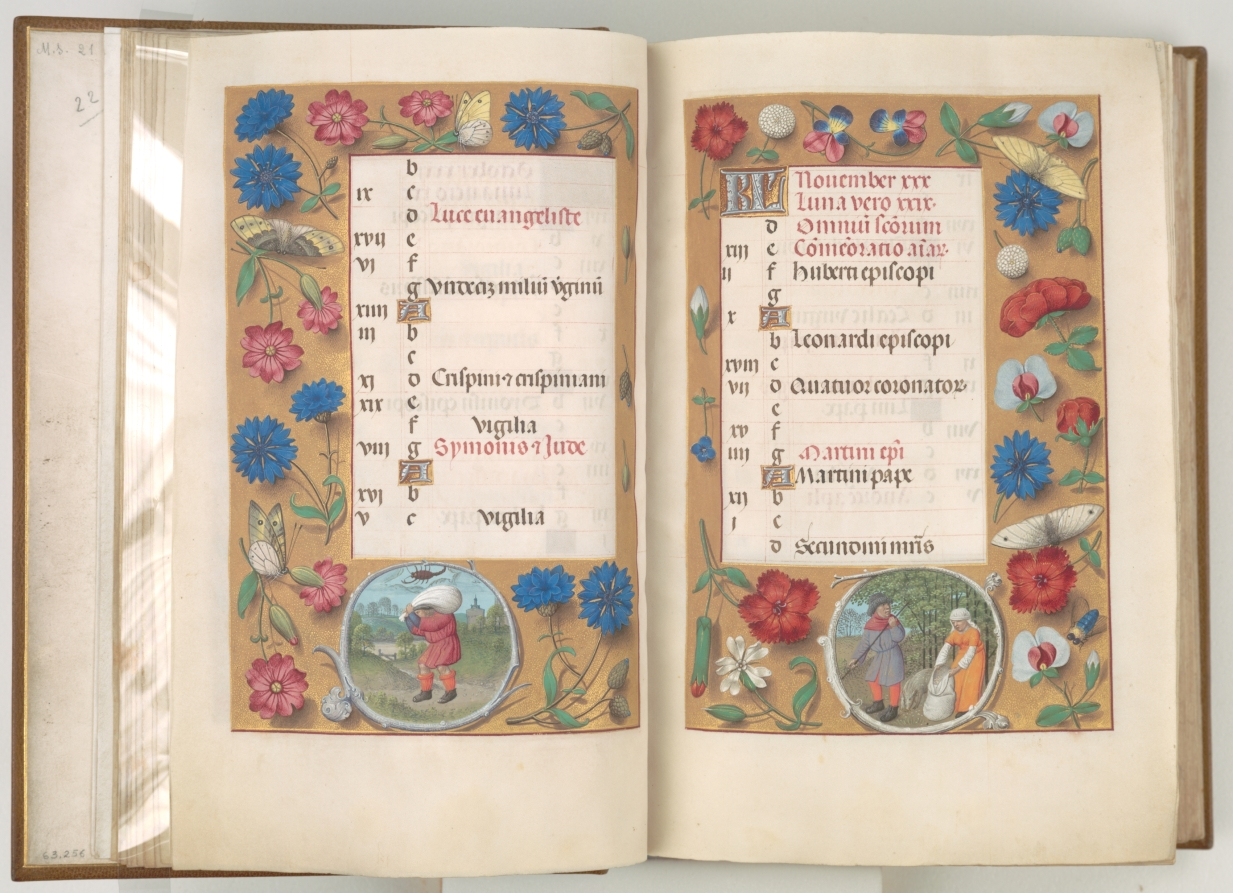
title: Hours of Queen Isabella the Catholic, Queen of Spain: Fol. 12r, November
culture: Flanders, Ghent and Bruges, late 15th century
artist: Master of the First Prayerbook of Maximillian (Flemish, c. 1444–1519)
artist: and Associates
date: c. 1500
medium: ink, tempera, and gold on vellum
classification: Bound Volume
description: This manuscript was illuminated by a circle of at least five highly organized manuscript painters active in the Flemish cities of Ghent and Bruges. The principal illuminator was Alexander Bening, who painted the majority of the book's miniatures. Manuscripts produced by this circle of artists are renowned for the decoration of their borders, which typically feature a rich variety of realistically-painted flowers, birds, and butterflies. This prayer book, called a book of hours, was intended not for a cleric, but for the private devotions of a lay person-in this case, Isabella the Catholic, Queen of Spain (1451-1504). Isabella's coat of arms embellishes the book's frontispiece. It is unlikely that the book was commissioned by the Queen herself; rather, she probably received it as a diplomatic gift from someone courting her patronage, perhaps Cardinal Francisco Jimenez de Cisneros. A Franciscan friar, Jimenez was dependent upon Isabella for his advancement, first to the post of Queen's confessor in 1492, and then to Archbishop of Toledo in 1495.